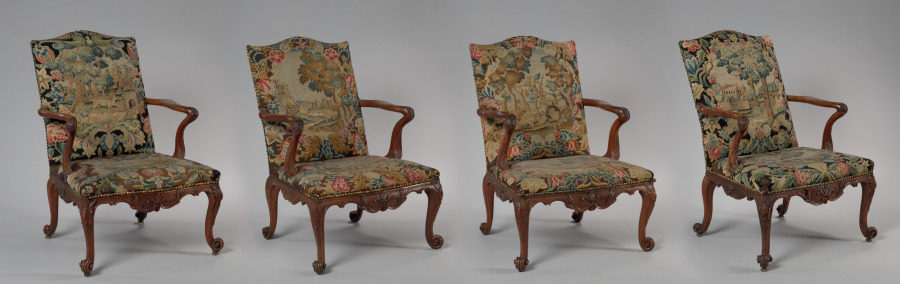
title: Set of Four Armchairs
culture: England, 18th century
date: 1760–1765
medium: mahogany upholstered in needlework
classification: Furniture and woodwork